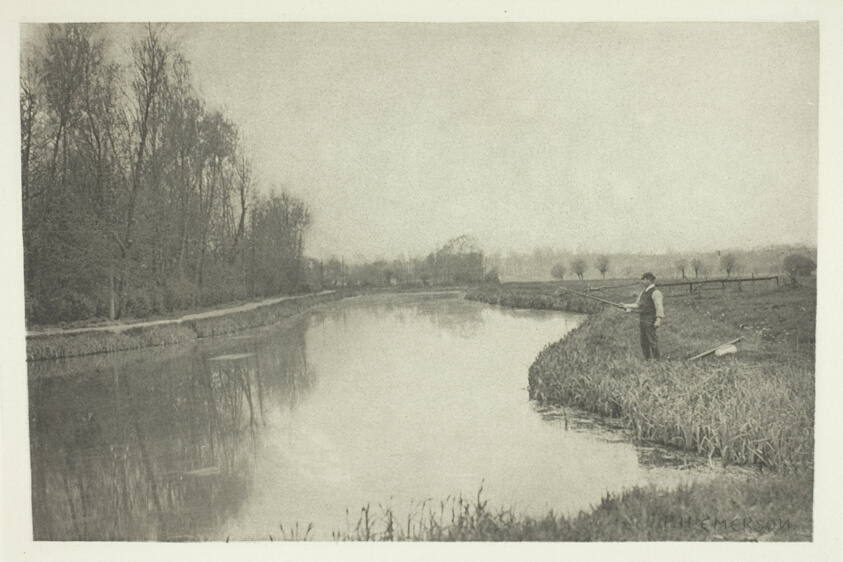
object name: Photograph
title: The October Hole, Near Hoddesdon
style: 19th century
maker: Peter Henry Emerson (English, born Cuba, 1856–1936)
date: 1880s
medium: Photogravure, plate X from the album "The Compleat Angler or the Contemplative Man's Recreation, Volume I" (1888)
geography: England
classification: photogravure; photomechanical process; photography; photograph